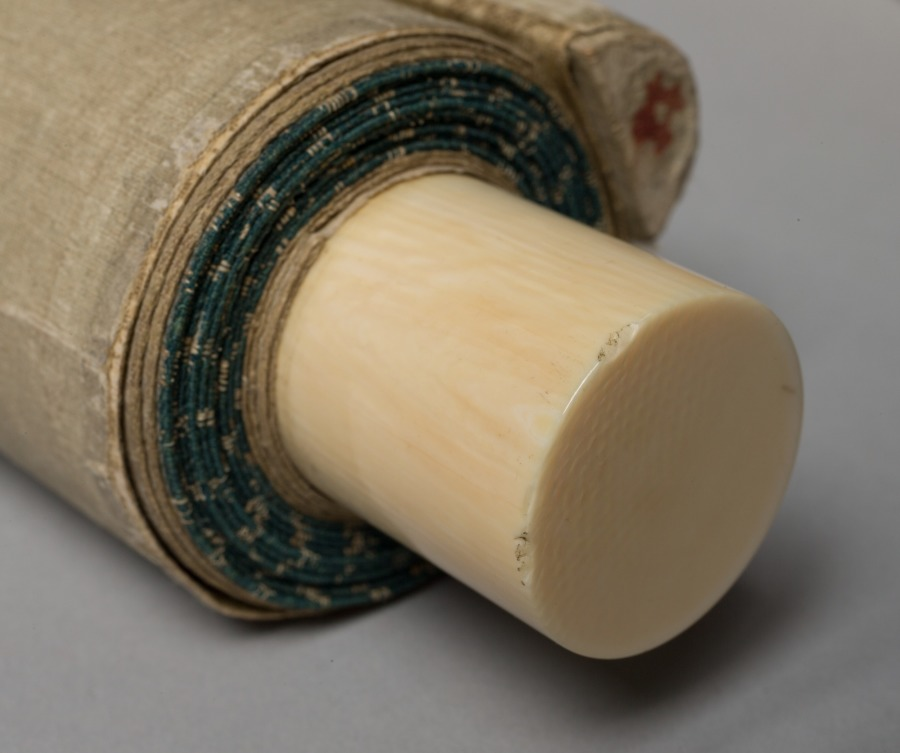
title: Courtesan and Attendants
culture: Japan, Edo period (1615–1868)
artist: attributed to Engetsudō (Japanese)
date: c. 1748–51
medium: hanging scroll; ink and color on paper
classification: Painting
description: The courtesan wears a pair of tall, lacquered wooden clogs and heavy robes, indicating it is winter. The elaborate span of her tortoiseshell comb in her fashionable coiffure enhances her glamorous appearance. Her blue-and-white striped obi is tied in a loose bow in front, typical for her profession. The round, stylized cherry blossom crest of her "house" (brothel), partially visible on her shoulder just above the shawl, also appears on the robes of her two attendants (kamuro). The attendants hold shuttlecocks, used in a game associated with New Year celebrations. One girl stares out at the viewer; the other looks back. The frontal view of the attendant’s face is somewhat rare in ukiyo-e painting and prints.